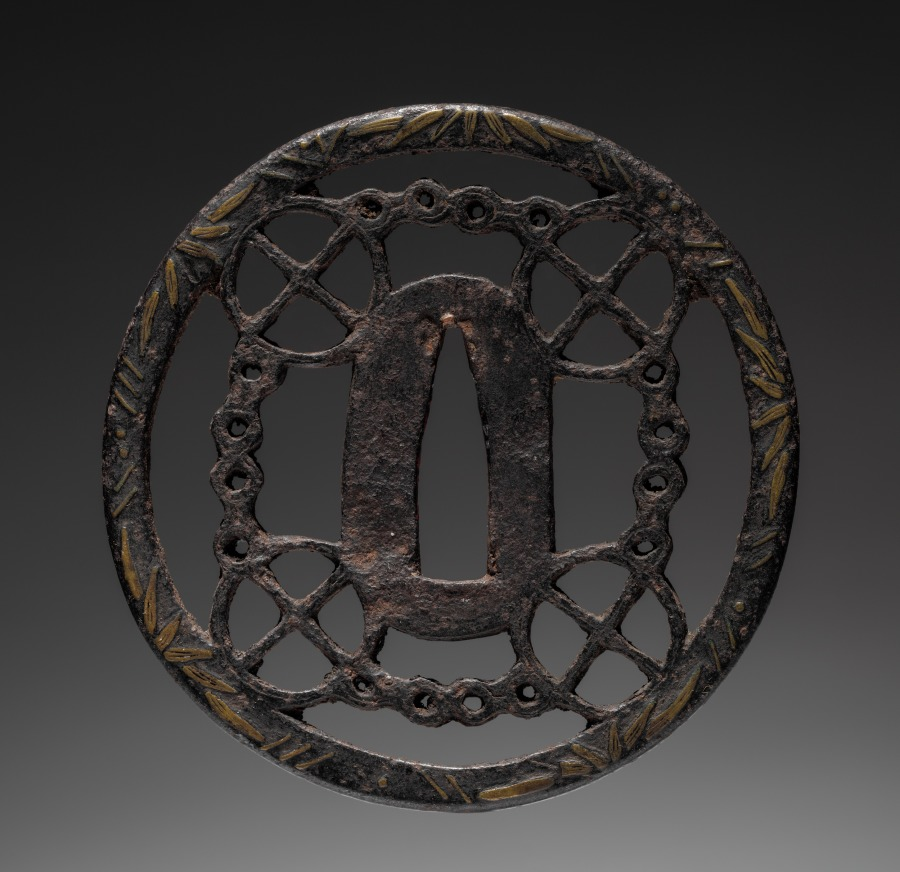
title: Sword Guard (Tsuba)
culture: Japan, possibly Edo period (1615-1868)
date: c. 1615–1868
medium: iron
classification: Arms and Armor